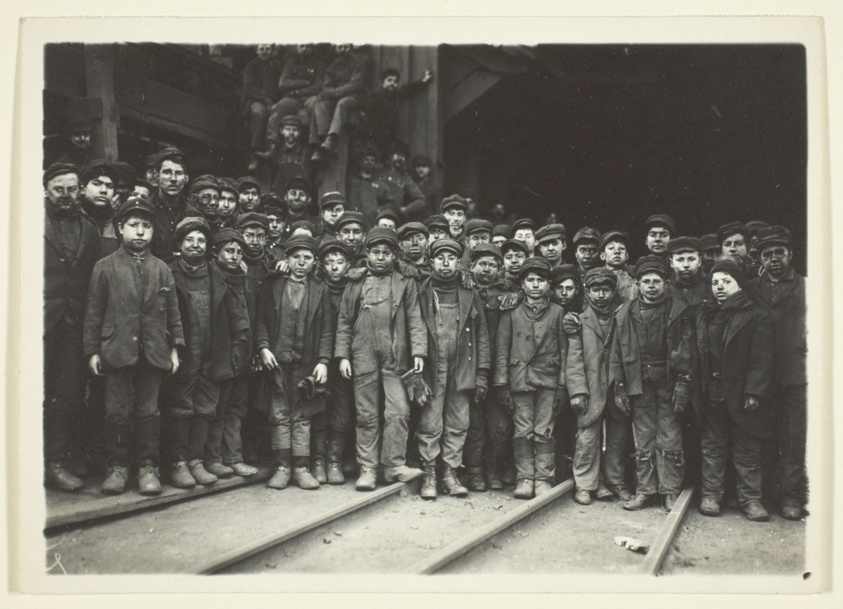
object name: Photograph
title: Breaker Boys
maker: Lewis Wickes Hine (American, 1874–1940)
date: 1909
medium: Gelatin silver print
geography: United States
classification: gelatin silver (developing-out-paper) pr; photographic process; photography; photograph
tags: Collected by Hugh Edwards, documentary